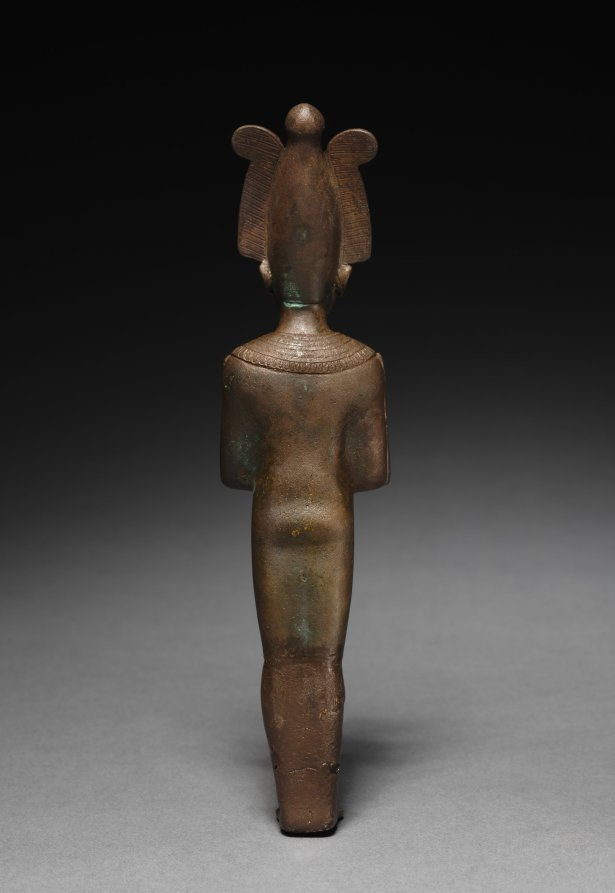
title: Statuette of Osiris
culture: Egypt, Late period (715–332 BCE), Dynasty 26 or later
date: 664–525 BCE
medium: bronze, hollow cast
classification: Sculpture